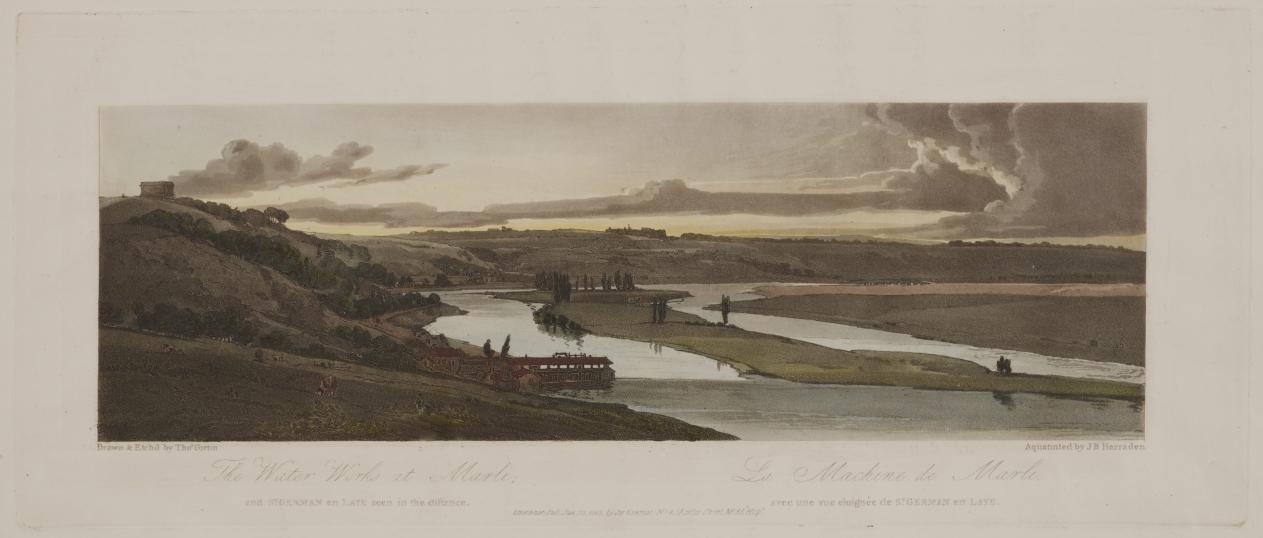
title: A Selection of Twenty of the Most Picturesque Views in Paris: The Water Works at Marli, and St. Germain en Laye seen in the distance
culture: England, 19th century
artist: Thomas Girtin (British, 1775–1802)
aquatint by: J.B. Harraden (British)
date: 1803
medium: softground etching and aquatint printed in brown, hand-colored with watercolor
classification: Print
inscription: In plate: Drawn & Etch'd by Thos Girtin; Aquatinted by J. B. Harraden; LONDON: Pubd Jan 15, 1803 by John Girtin, No. I, Little Newport Street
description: Girtin, along with his rival J. M. W. Turner, extended the technical possibilities of watercolor and in doing so demonstrated that watercolors could have the visual impact of oils. His reduction of landscape to simple and monumental forms, his panoramic compositions, and his sensitivity to natural effects, such as cloud formations, influenced subsequent generations of watercolor painters. Anxious to take advantage of the Peace of Amiens (October 1, 1801), Girtin went to Paris to see the artistic treasures brought back from Italy by Napoleon and installed in the Louvre. He made graphite sketches of the city and its environs and upon his return to London made etchings based on his drawings. Girtin died of tuberculosis shortly thereafter, and the series was published by his widow and brother.